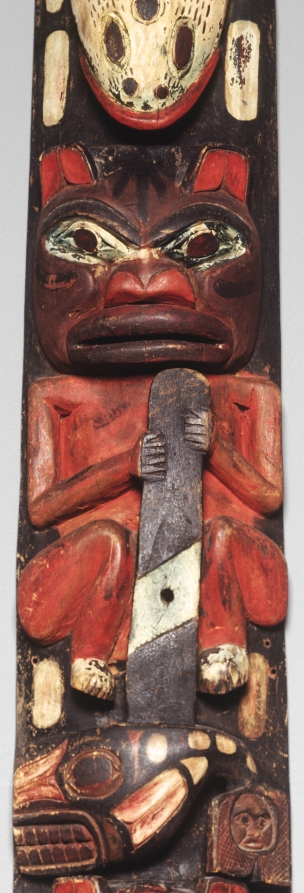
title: Totem Pole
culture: Northwest Coast, Tlingit, 19th century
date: c. 1880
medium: carved and painted wood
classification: Sculpture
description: Native American villages of the Pacific Northwest were marked by great totem poles that proclaimed the rank and ancestry of their owners. This small model pole was once owned by a Tlingit storyteller, a member of the coho salmon clan, of the raven tribe. Because the pole has been stored indoors, its carving and bright, original colors are undamaged by the elements. Reportedly, this totem pole illustrates several stories. Kushda-Kaw, the land-otter, is the pole's lowermost figure; above him is his wife. The wife transforms herself into an owl (the third figure from the bottom) and flies into the trees to keep watch. Kushda-Kaw then lies in wait to frighten and harass unwary passers-by. Above the owl is a finback whale carrying a friend out to sea for fishing. Near the top of the pole is a whale with red lips who has swallowed his enemy, the raven. The tiny figure at the pole's summit is a spirit-woman, the raven's lover. She will cut the whale open to rescue him.